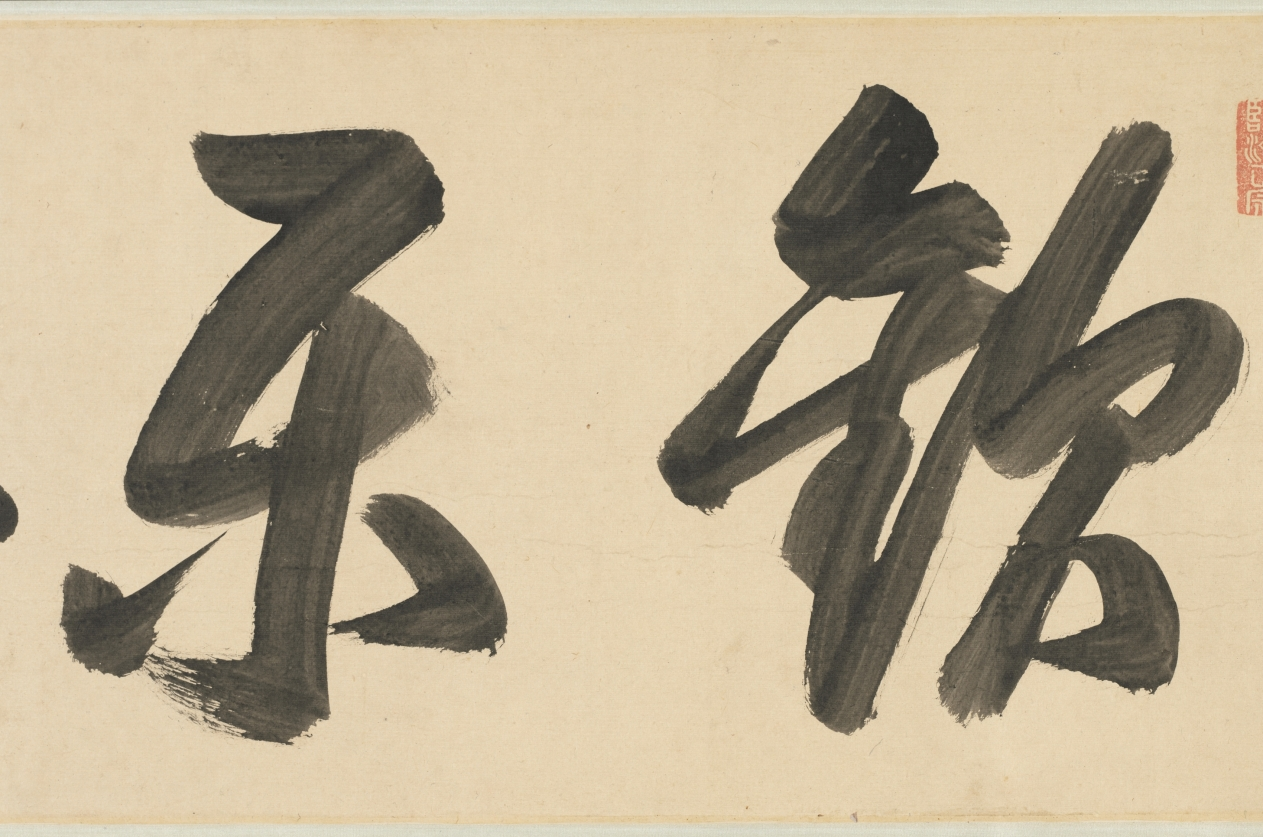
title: Purification at the Orchid Pavilion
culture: China, Qing dynasty (1644-1911)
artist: Fan Yi (Chinese, c. 1615–before 1688)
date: 1671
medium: Handscroll; ink and color on silk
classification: Painting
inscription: Artist's inscription, signature, and 2 seals: Painted by Fan Yi of Zhongfu during the second month of winter of the xinhai year [1671]. [2 seals] Fan Yi zhi yin, Zi yu yi.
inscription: Title on the frontispiece by Monk Yueshan (1629-1709).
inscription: 3 colophons and 13 additional seals: 1 colophon, dated 1707, and 6 seals of Yueshan; 2 colophons and 3 seals of Wong Kwan-Shut (Huang Junshi) 黃君實 (b. 1934); 2 seals of Fu Shen 傅 申 (b. 1937); 2 seals of Tessai Tomioka 富岡鐵齋 (1836-1924).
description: By the 1600s, the historic gathering at Lanting, Zhejiang province, in 353 CE was a common theme in Chinese painting. Originally based on a composition attributed to Li Gonglin (1049– 1106), now lost, Wu school artists revived the theme. Fan Yi, the brother of the artist Fan Qi from Nanjing, used delicate brushwork and luminous colors to depict the spring gathering.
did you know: The gathering’s host is in the Orchid Pavilion at the end of the scroll, representing an episode known as “Wang Xizhi Watching the Geese 王羲之觀鵝圖.”